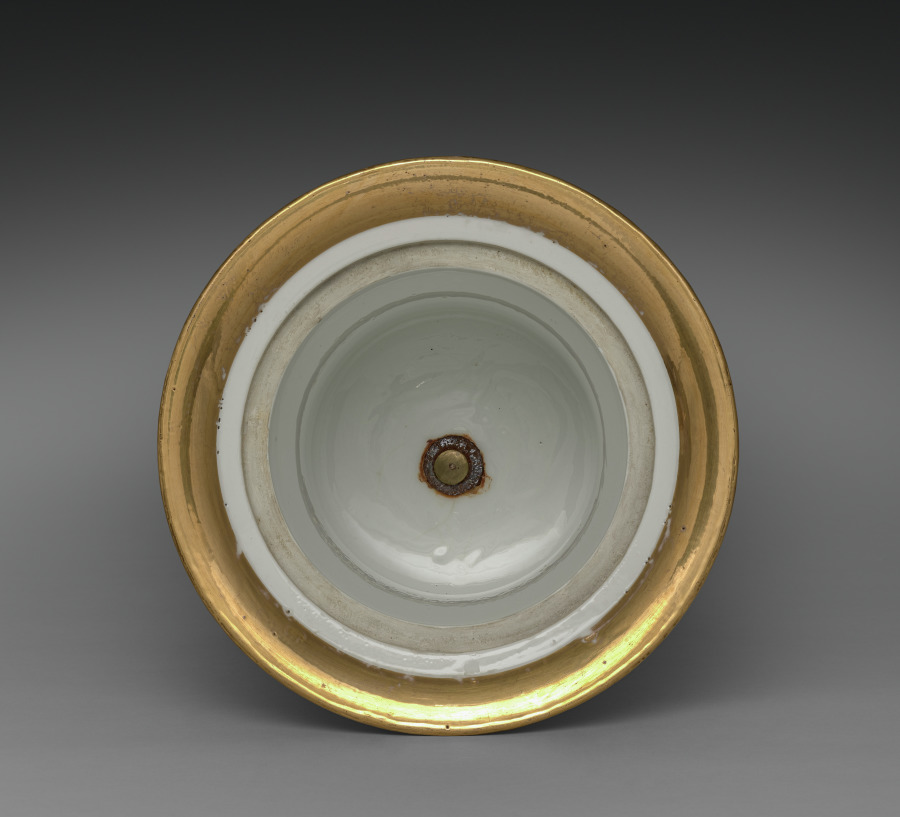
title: Ice Cream Pail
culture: France, Paris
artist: Factory of Jacob-Petit (French, 1830–1865)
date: c. 1840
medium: gilt porcelain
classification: Ceramic